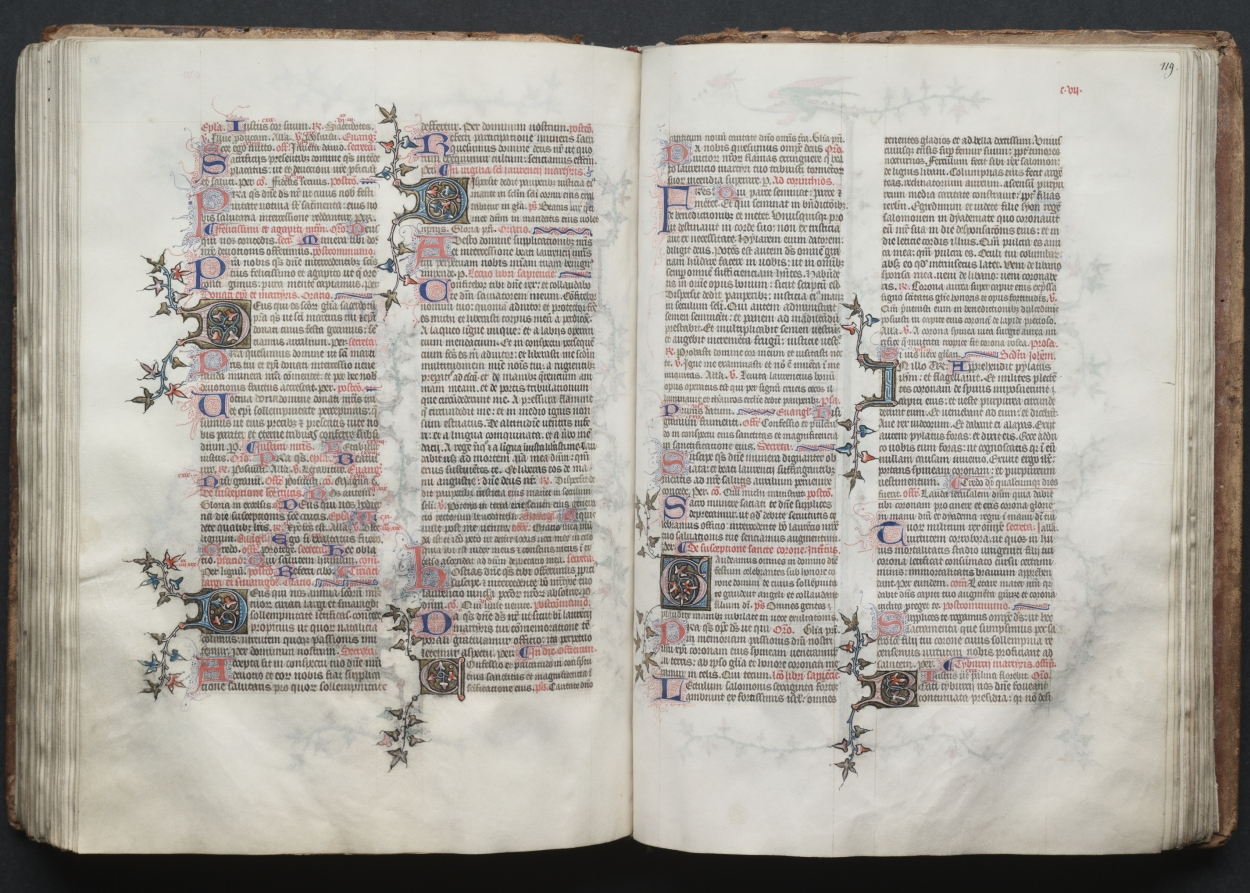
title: The Gotha Missal: Fol. 119r, Text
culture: France, Paris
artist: Master of the Boqueteaux (French)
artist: and Workshop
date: c. 1375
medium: ink, tempera, and gold on vellum; blind-tooled leather binding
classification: Bound Volume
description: The style and quality of this manuscript's decoration is typical of deluxe Parisian books made for aristocratic or royal patrons. Most of the book's decoration appears to be the work of the Master of the Boqueteaux, an artist active at the court of King Charles V (died 1380). His style was apparently shared by a number of book illuminators working in and around Paris. It is very possible that the Gotha Missal belonged to Charles V, but is not provable because the manuscript has no royal portraits and lacks a colophon. Given the book's magnificent decoration, however, it would seem that it was produced for a Valois prince, if not for the king himself. The manuscript receives its name from the German dukes of Gotha, its later owners.